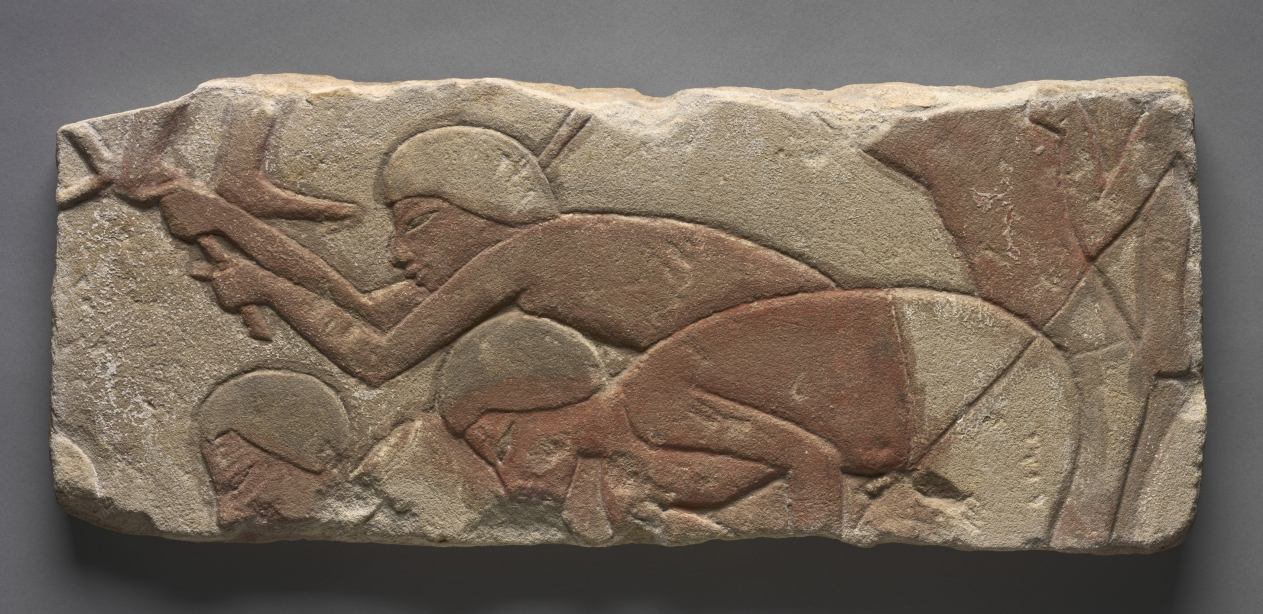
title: Talatat: Men Hoeing the Earth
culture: Egypt, Karnak, New Kingdom (1540–1069 BCE), Dynasty 18, reign of Akhenaten (1351–1334 BCE)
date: c. 1353–1347 BCE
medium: painted sandstone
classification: Sculpture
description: In the early part of his reign, Amenhotep IV built an enormous temple to the sun disk (Aten) at the east end of the temple of Karnak. To expedite construction, sandstone was quarried in small, regularly sized, easily manageable blocks called talatat. Unlike the huge monoliths typically used in temple construction, talatat could be carried and moved into position by one man. Not all of the temple was built of stone, however. In this block, workmen are shown bent in toil. They once formed part of a panoramic scene depicting the production of mud bricks. The men are involved in the initial stages of this process: hacking up the earth and gathering the raw clay. It is very likely that this talatat represents a distinct historical event, undoubtedly connected with Amenhotep IV’s huge building enterprises at East Karnak.